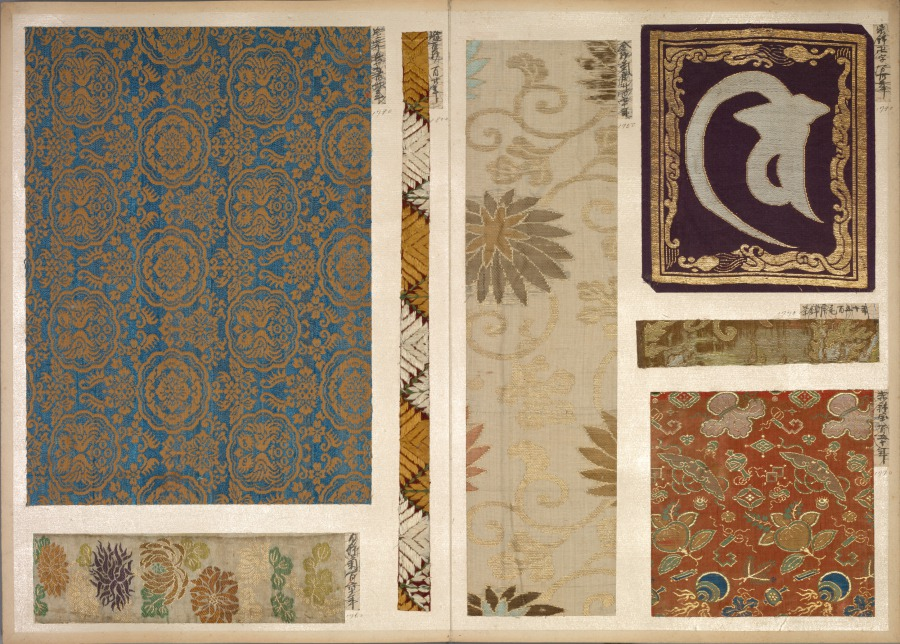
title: Album of Textile Samples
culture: Japan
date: 1790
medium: silk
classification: Textile